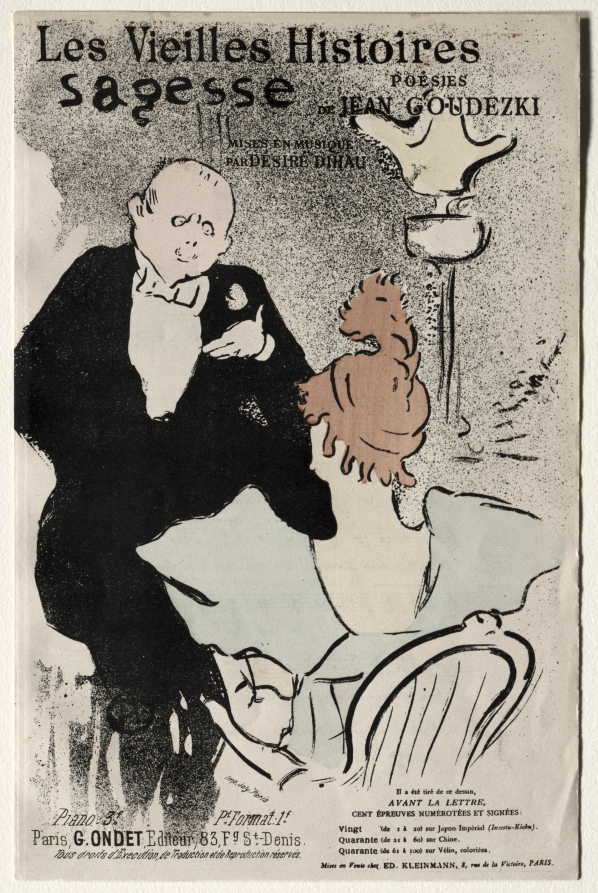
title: Les Vieilles histoires: Sagesse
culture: France, 19th century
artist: Henri de Toulouse-Lautrec (French, 1864–1901)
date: 1893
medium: lithograph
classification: Print